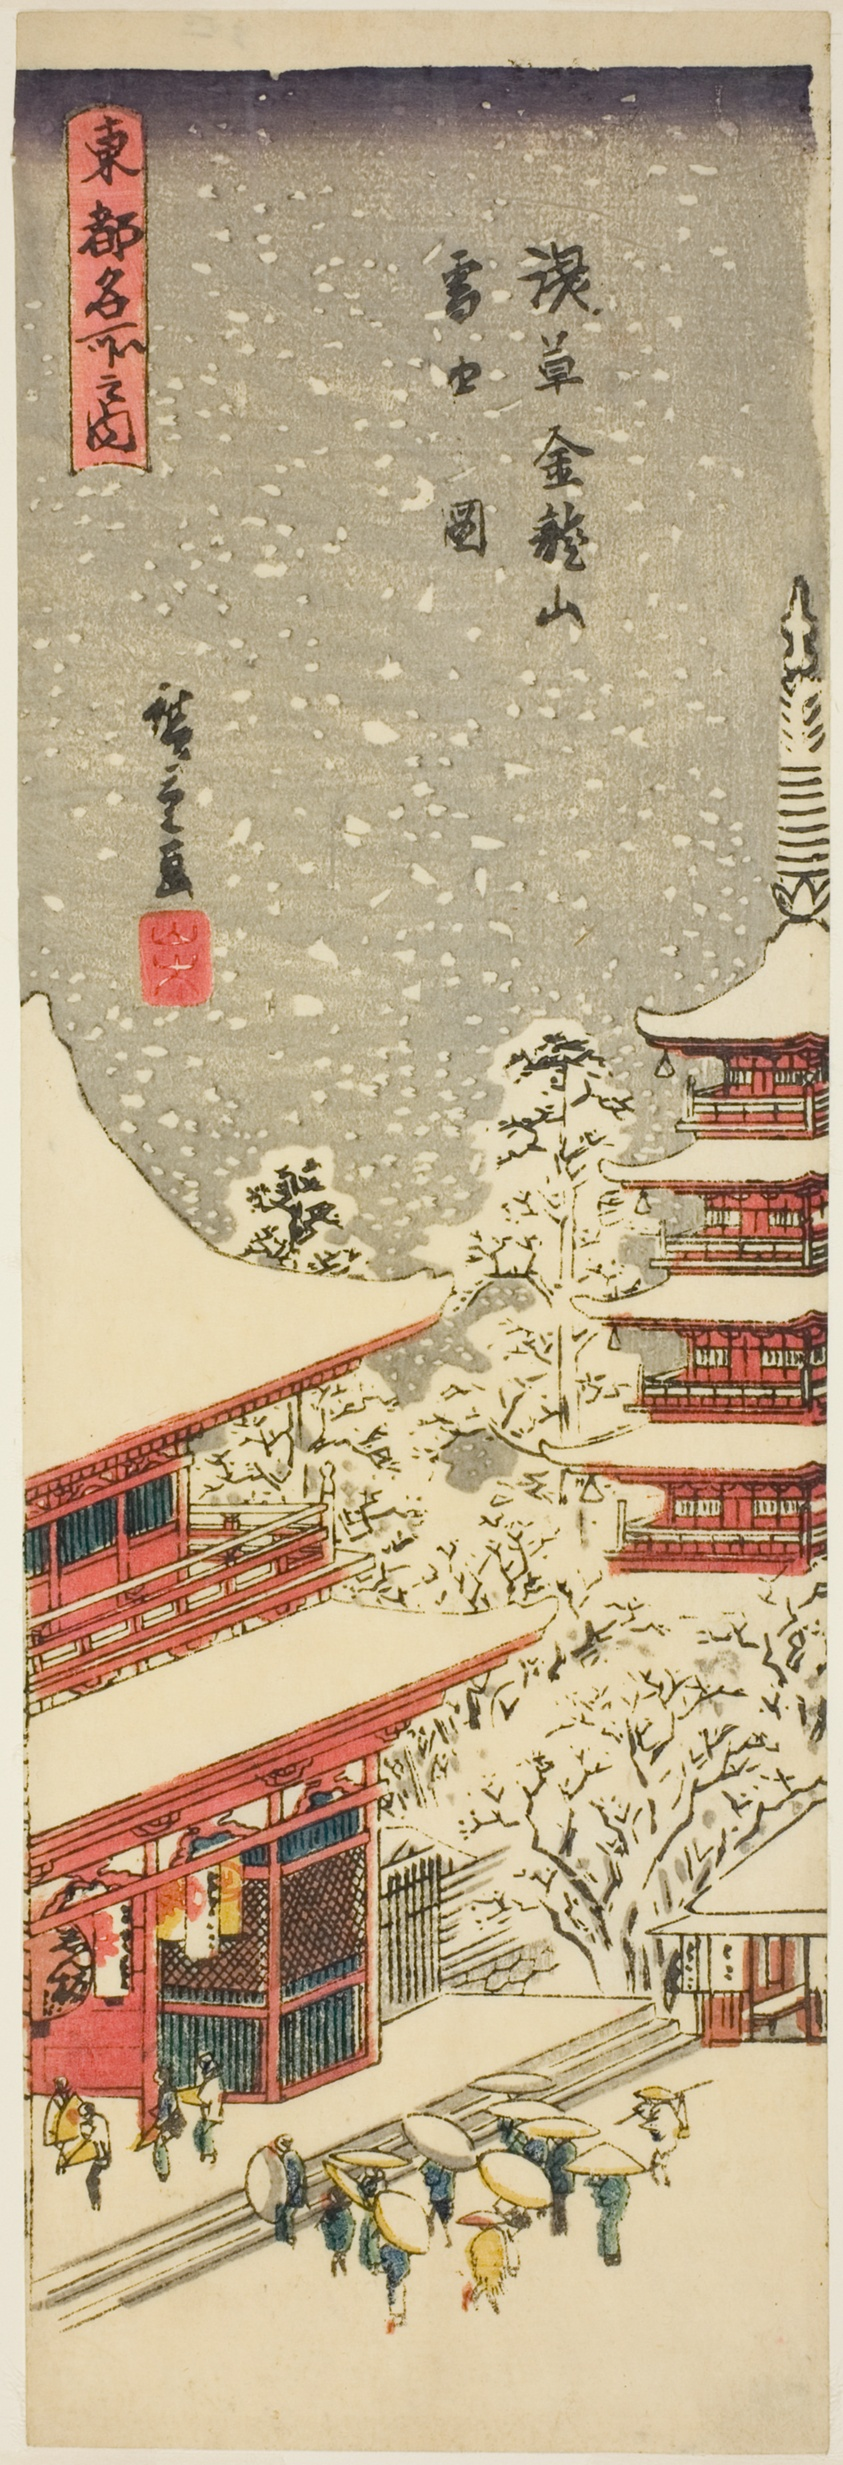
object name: Print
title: Kinryuzan Temple in Asakusa in Falling Snow (Asakusa Kinryuzan setchu no zu), from the series "Famous Views of the Eastern Capital (Toto meisho no uchi)"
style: Japanese (culture or style)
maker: Utagawa Hiroshige 歌川 広重; Japanese, 1797–1858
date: 1840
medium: Color woodblock print; tanzaku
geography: Japan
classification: woodblock print; print; asian art